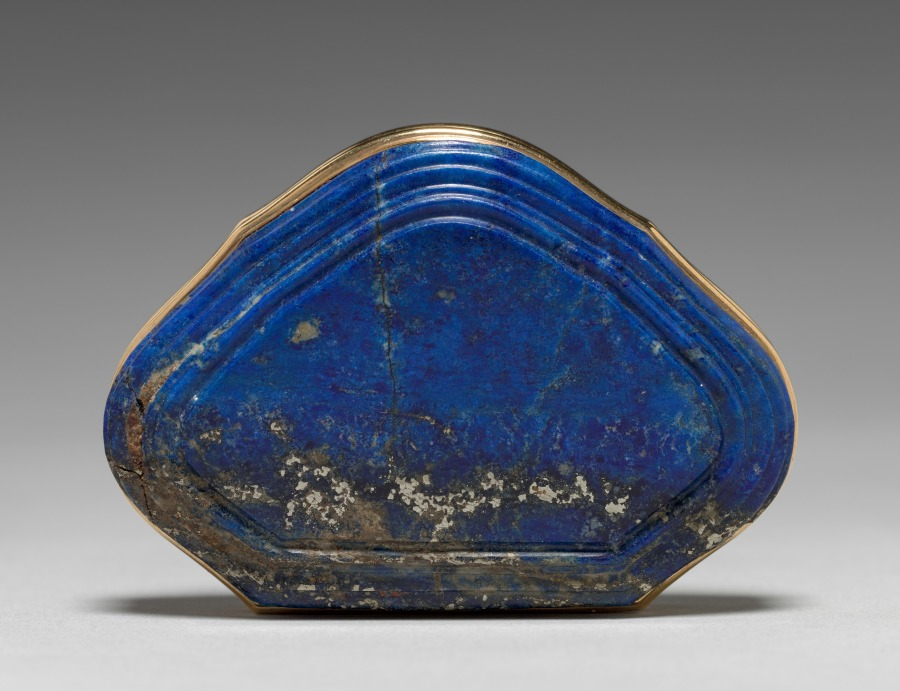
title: Snuff Box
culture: Germany, Dresden (?), mid-18th century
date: mid-1700s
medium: lapis lazuli with enameled gold mounts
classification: Miscellaneous